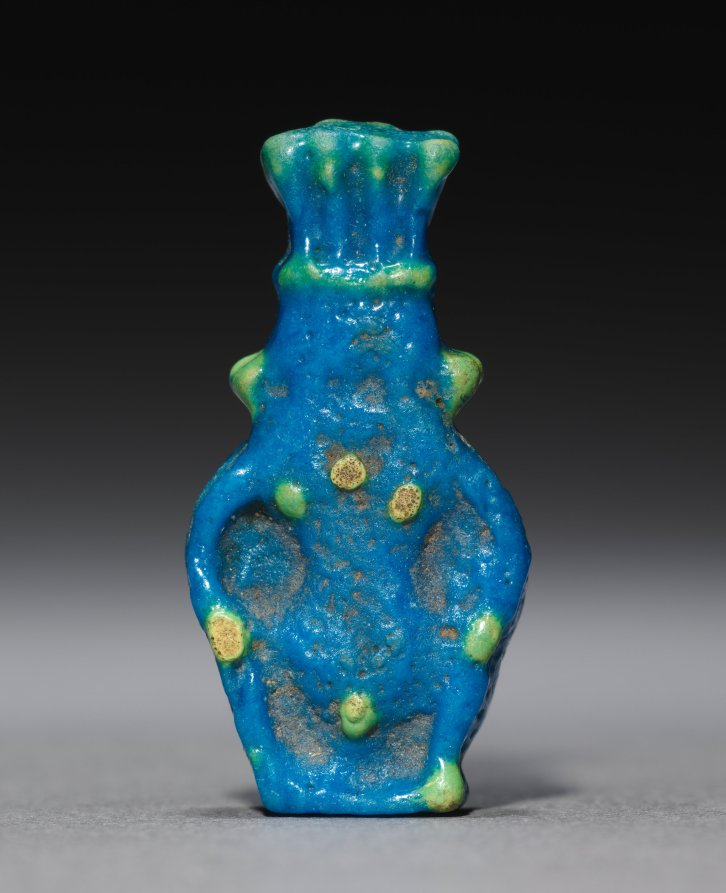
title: Amulet of Bes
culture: Egypt, Greco-Roman period (332 BCE–395 CE), Roman empire (30 BCE–395 CE)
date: 30 BCE–395 CE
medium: polychrome faience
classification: Amulets